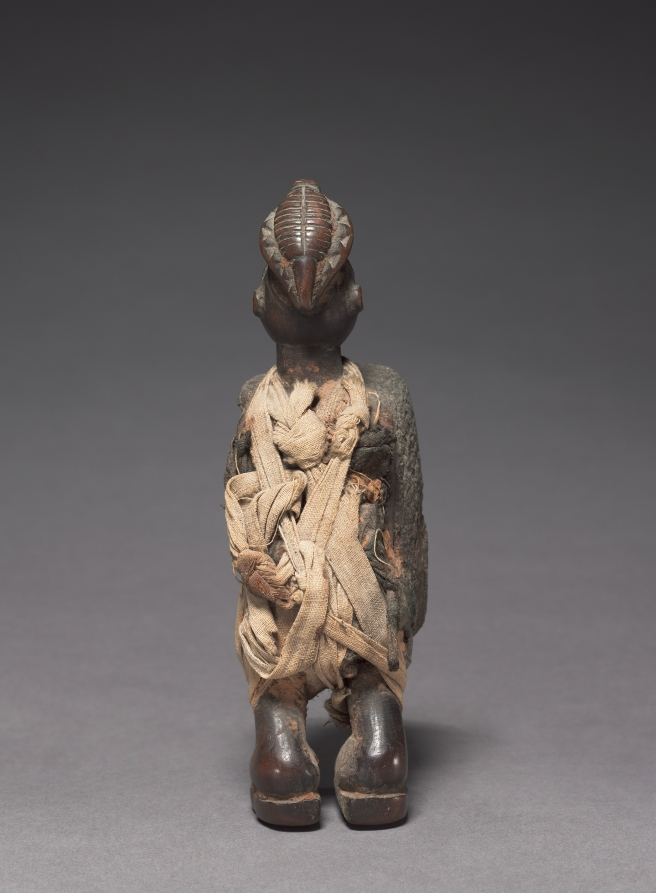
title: Male Figure (Nkisi)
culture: Africa, Central Africa, Democratic Republic of Congo (most likely), Cabinda, or Republic of the Congo, probably Yombe-style maker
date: late 1800s-early 1900s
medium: Wood, organic material (including resin), metalized glass, and cloth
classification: Sculpture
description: Nkisi is often associated with the word spirit, as these figures are believed to host a variety ancestral spirits. With an intact mirror-covered stomach cavity, this figure was not decommissioned before sale or disposal, deeming its particular powers sustained. The cloth knots and carvings suggest that it was used to bind agreements or oaths, and to reconcile social and cosmological contradictions.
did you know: The medicinal substances remain intact in this particular figure, which is rare, as most were decommissioned before museum acquisition.